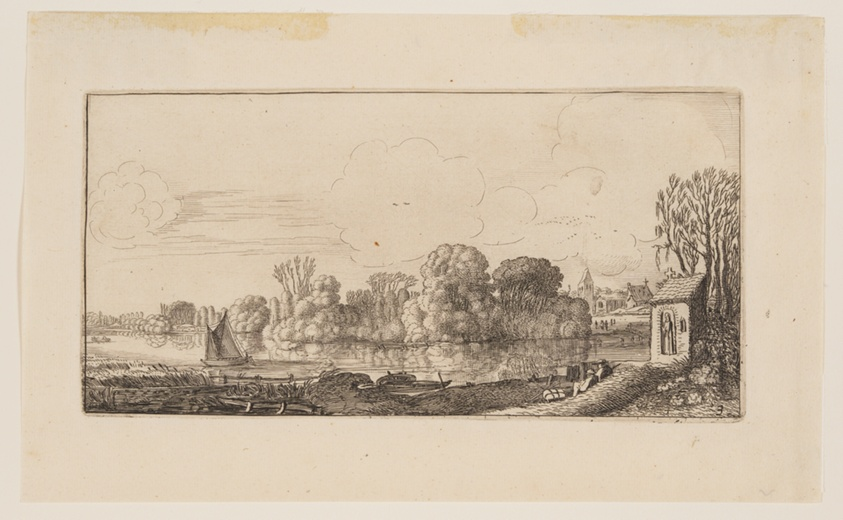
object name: Print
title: A Little Chapel by a Pond, from Six Landscapes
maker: Jan van de Velde II; Dutch, c. 1593–1641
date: c. 1613-1640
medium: Etching on ivory laid paper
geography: Netherlands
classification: etching; paper; print; prints and drawing